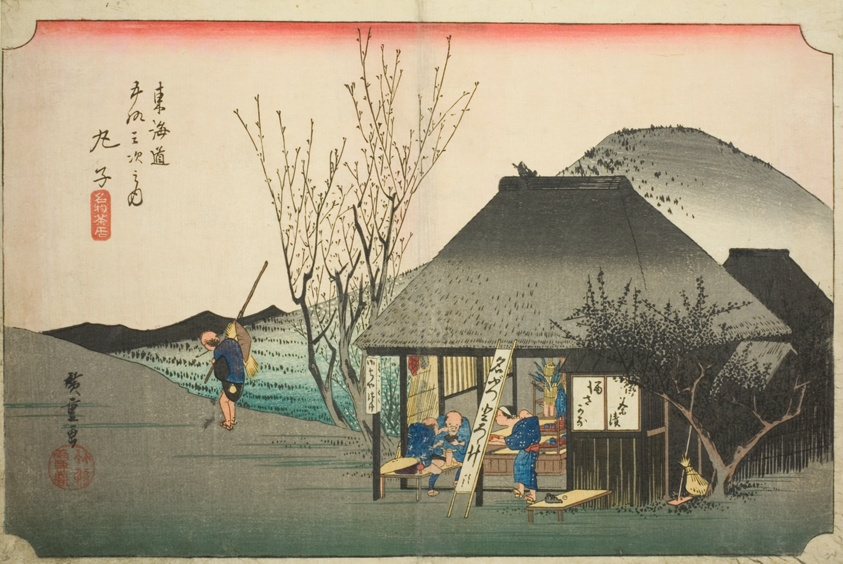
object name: Print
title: Mariko: Famous Tea Shop (Mariko, meibutsu chamise), from the series "Fifty-three Stations of the Tokaido Road (Tokaido gojusan tsugi no uchi)," also known as the Hoeido Tokaido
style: Japanese (culture or style)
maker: Utagawa Hiroshige 歌川 広重; Japanese, 1797-1858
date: c. 1833/34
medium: Color woodblock print; oban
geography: Japan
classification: woodblock print; print; asian art